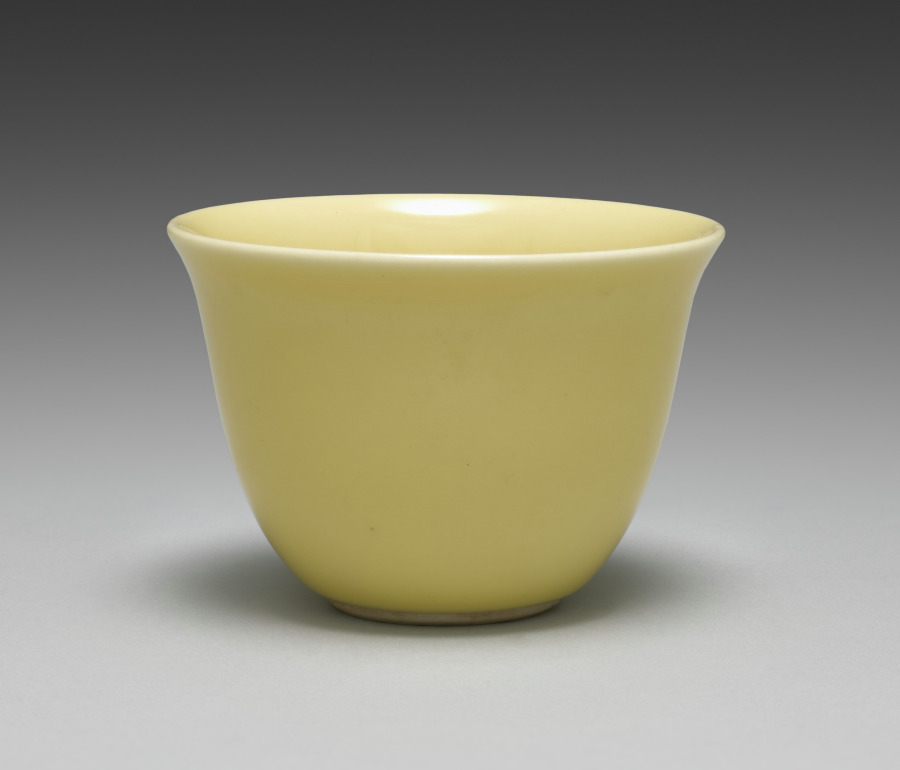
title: Cup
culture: Japan, Taishō period (1912–26) or Shōwa period (1926–89)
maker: Seifū Yohei IV (Japanese, 1872–1951)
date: 1914–46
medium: porcelain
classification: Ceramic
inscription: 清風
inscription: 清風造 【印】成山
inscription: 清風盧人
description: Like his father, Yohei IV also produced works with red or yellow monochrome glazes. His yellow-glazed works include this set of five drinking cups, a pair of sake pourers CMA 2022.216, and a sweets bowl molded into the shape of a chrysanthemum CMA 2022.218.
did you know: Seifū Yohei IV learned the ceramics industry from his father and painting from Tanomura Shosai.